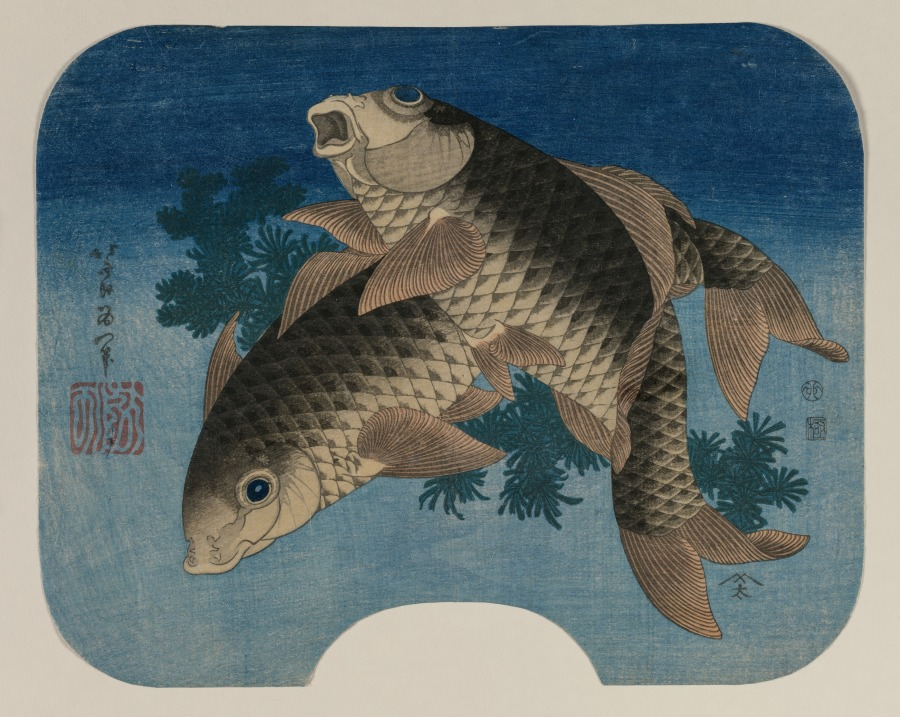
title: Carp Swimming by Water Weeds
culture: Japan, Edo period (1615–1868)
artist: Katsushika Hokusai (Japanese, 1760–1849)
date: 1831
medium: color woodblock print; fan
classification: Print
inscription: Signature: Hokusai aratame Iitsu hitsu Censorship seal: kiwame